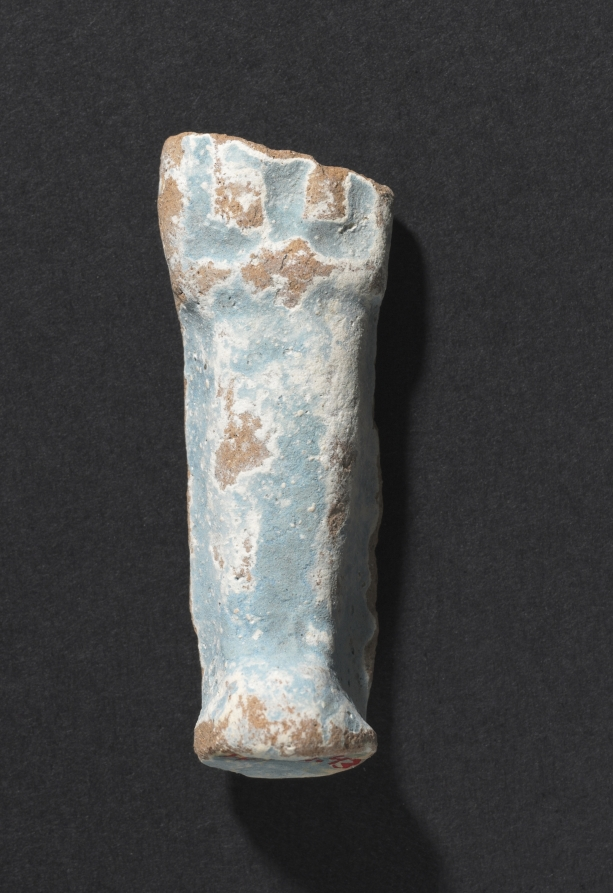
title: Shawabty of Ditamenpaankh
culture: Egypt, Late period (715–332 BCE), Dynasty 25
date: 715–656 BCE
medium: terracotta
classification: Funerary Equipment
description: High demand for shawabtys in the Late Period, a time when as many as 400 or more shawabtys were placed in the tomb with the deceased, gave rise to a specialized container for storing them: the shawabty box. This example is inscribed for the lady of the house, Ditamenpaankh, and was probably one of a pair originally made for her. The single-masted boat on the box's lid is perhaps an allusion to the pilgrimage of the deceased to the holy city of Abydos, the cult city of Osiris, king of the dead. The shawabtys inside are crude, mass-produced examples cast in an open mold. Made of terracotta, their blue paint imitates more costly shawabtys made of faience. As for the shawabty spell, it has been removed from its traditional location on the shawabty's front and relocated onto the sides of box, where it needed only to be written once, thus expediting production.